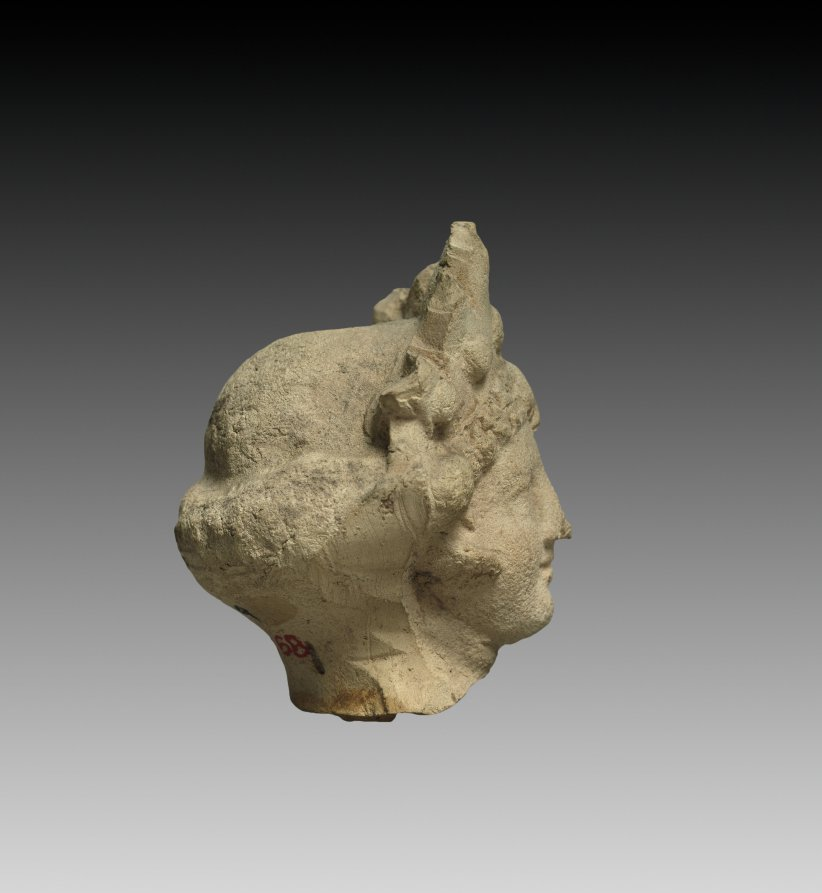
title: Head of a Goddess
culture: Parthian Empire (247 BCE–224 CE)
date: 1–200 CE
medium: terracotta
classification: Sculpture